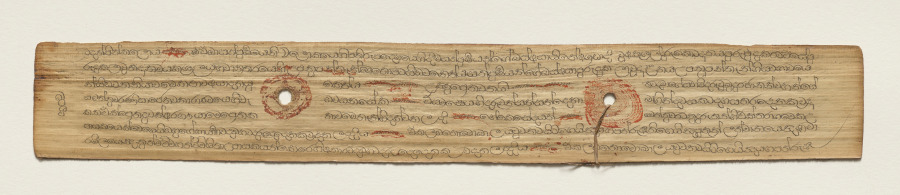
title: Leaf from a Buddhist Manuscript (recto)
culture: Sri Lanka, Singhalese, Late 17th century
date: c. 1700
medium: fiber paper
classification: Manuscript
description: Palm leaf material is still used for manuscripts in Sri Lanka. The palm leaves are prepared first by boiling them, drying them in the sun, and then rubbing them with oils. Scribes then use a metal stylus to incise the text. Then charcoal powder is wiped across the pages, filling in only the inscribed lines.